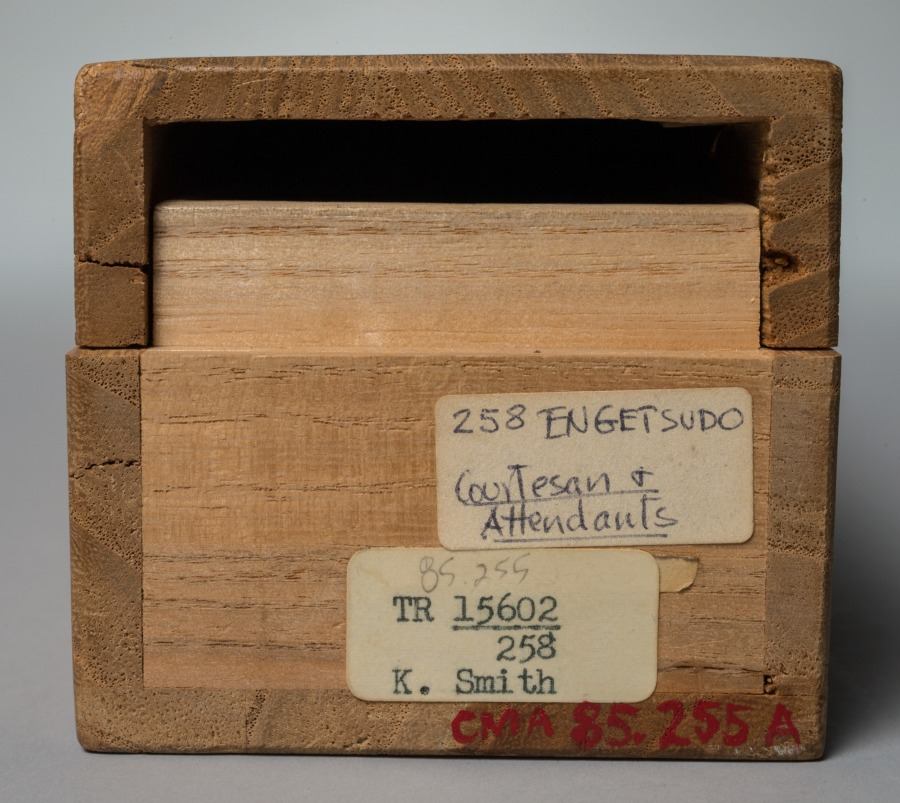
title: Courtesan and Attendants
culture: Japan, Edo period (1615–1868)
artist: attributed to Engetsudō (Japanese)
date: c. 1748–51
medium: hanging scroll; ink and color on paper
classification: Painting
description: The courtesan wears a pair of tall, lacquered wooden clogs and heavy robes, indicating it is winter. The elaborate span of her tortoiseshell comb in her fashionable coiffure enhances her glamorous appearance. Her blue-and-white striped obi is tied in a loose bow in front, typical for her profession. The round, stylized cherry blossom crest of her "house" (brothel), partially visible on her shoulder just above the shawl, also appears on the robes of her two attendants (kamuro). The attendants hold shuttlecocks, used in a game associated with New Year celebrations. One girl stares out at the viewer; the other looks back. The frontal view of the attendant’s face is somewhat rare in ukiyo-e painting and prints.